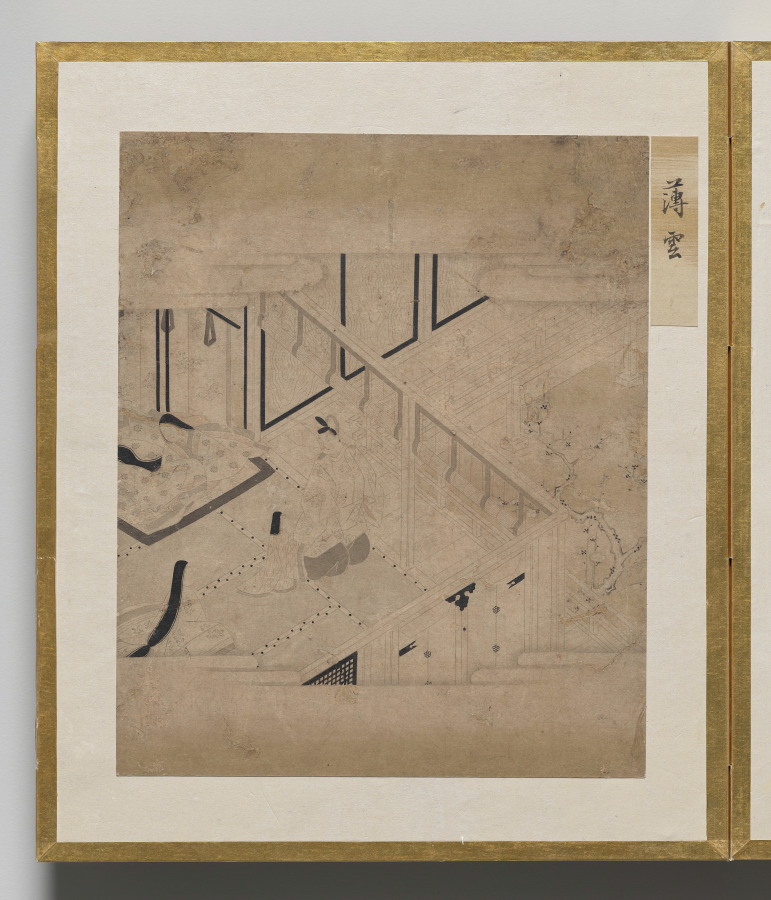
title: Rack of Clouds from Album of Illustrations for the Tale of Genji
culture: Japan, Edo period (1615–1868)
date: 1600s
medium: painting in an accordion-style album; ink, light color, and gold on paper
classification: Bound Volume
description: This album contains illustrations for the classic literary work the Tale of Genji, authored in the 1000s by Murasaki Shikibu, an aristocrat of the Heian period (794–1185) court. The scenes are painted in the “white drawing” (hakubyō) mode, in which a fine ink line is used to depict figures and spaces with great subtlety, punctuated only occasionally by traces of red pigment for a character’s lips, a detail of a garment, or a decorative element. These two scenes illustrate episodes from the chapters “Thin Veil of Cloud” (Usugumo) and “Barrier Gate” (Sekiya).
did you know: The illustrations are identified by chapter title in cartouches to the upper right of the paintings.